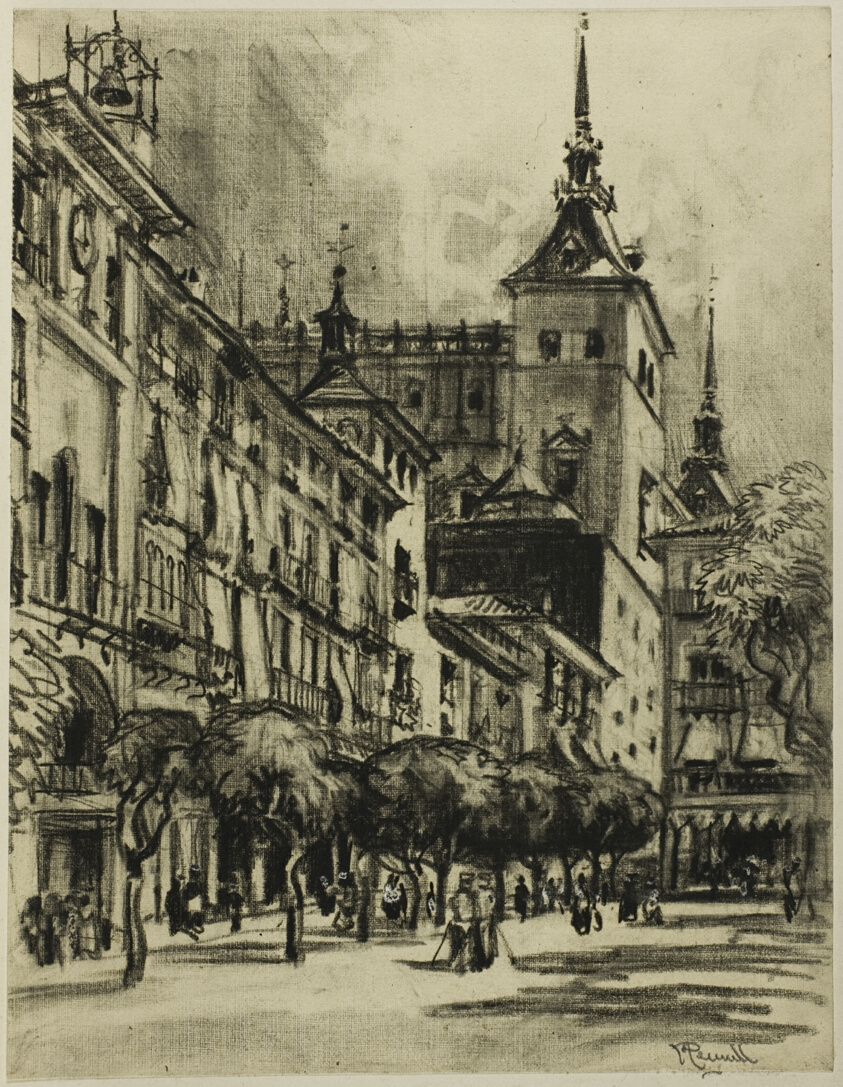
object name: Drawing and Watercolor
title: The Zocodover, Toledo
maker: Joseph Pennell (American, 1857-1926)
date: c. 1903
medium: Oiled charcoal with stumping and erasing, on cream wove paper, heightened with traces of white chalk, perimeter mounted on off-white wood-pulp laminate board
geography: United States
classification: charcoal; drawings (visual works); prints and drawing